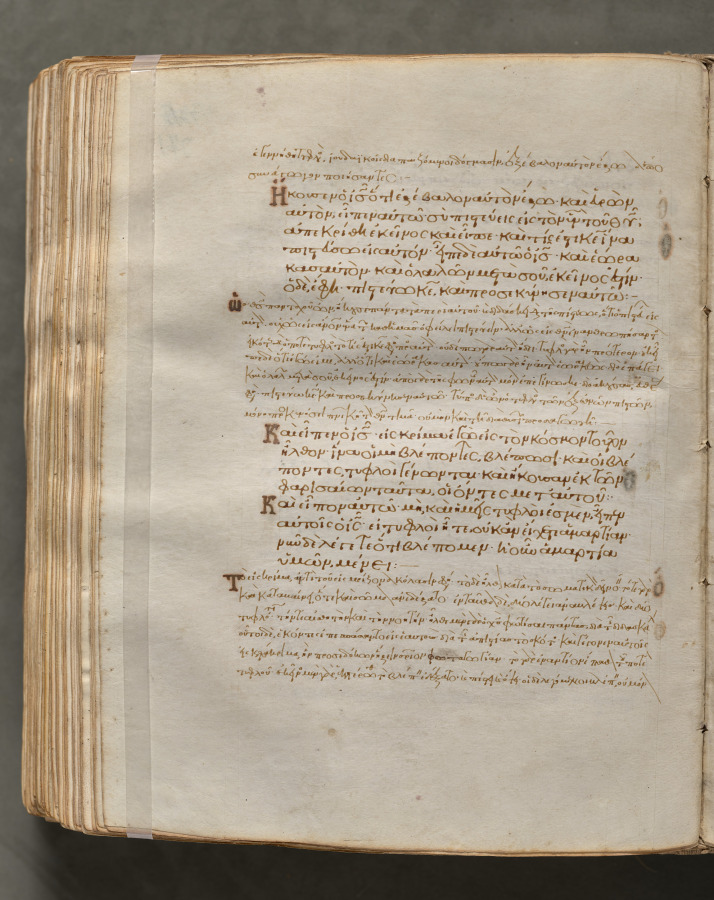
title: Text, folio 371 (verso), from a Gospel Book with Commentaries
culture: Byzantium, Constantinople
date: c. 1000–1100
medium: ink, tempera, and gold on vellum; leather binding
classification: Bound Volume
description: Each of the four gospels in this book opens on a page with brilliantly illuminated borders depicting the author of the text as well as birds—principally peacocks, symbols of the immortality of the soul—and fountains, representing the fountain of life and the salvation of the soul. This volume consists of 428 leaves with texts in Greek. Its level of sophistication suggests that it was probably written and decorated in a monastery in Constantinople.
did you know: Gospel books were carried in procession through Byzantine churches.